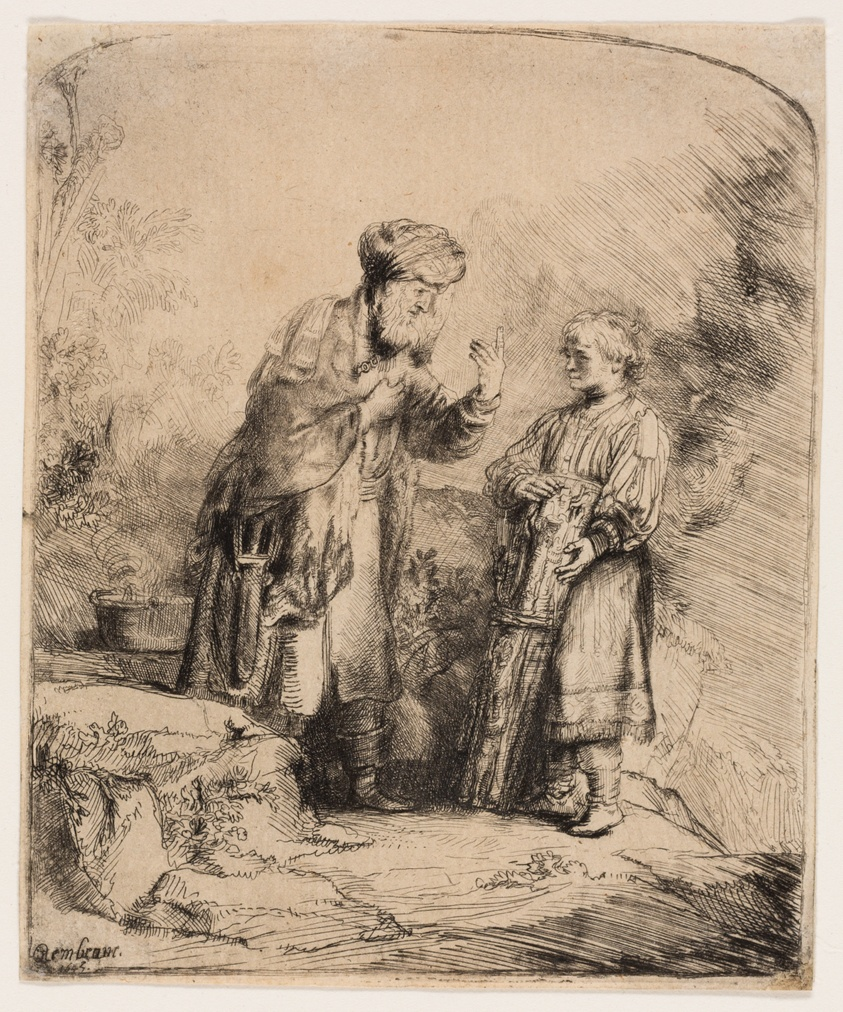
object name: Print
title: Abraham and Isaac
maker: Rembrandt van Rijn (Dutch, 1606-1669)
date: 1645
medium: Etching and drypoint on white laid paper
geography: Holland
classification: etching; print; prints and drawing; paper; drypoint